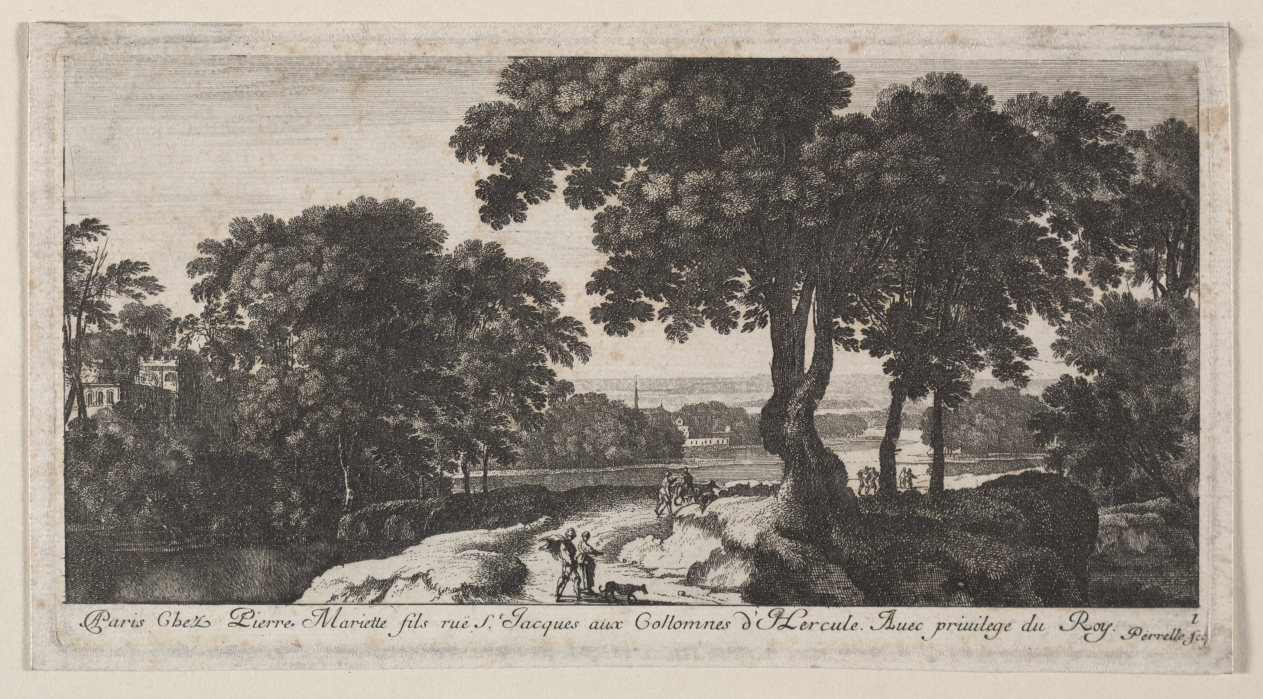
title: Landscape with Figures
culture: France, 17th century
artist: Gabriel Perelle (French, c. 1603–1677)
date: 1600s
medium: etching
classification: Print